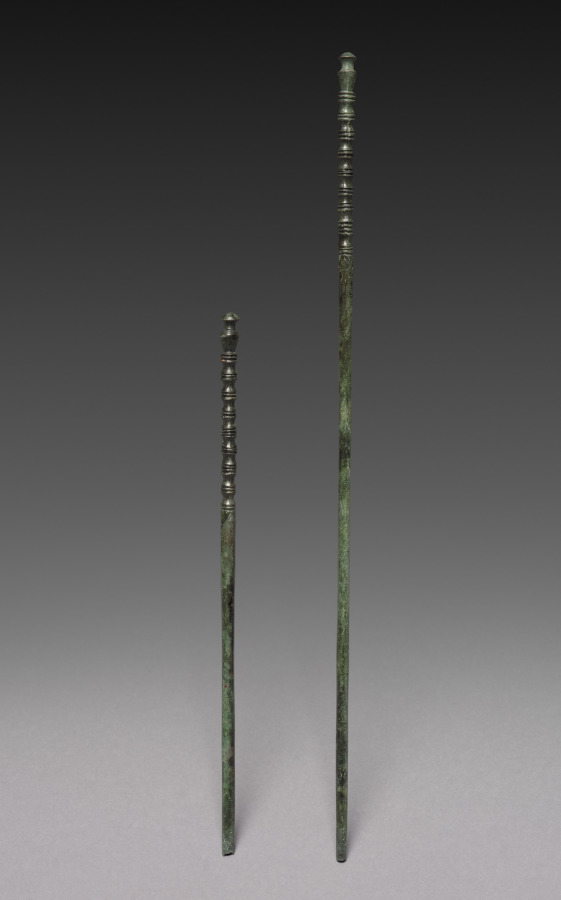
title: Pair of Chopsticks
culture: Korea, Goryeo dynasty (918–1392)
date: 918–1392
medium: bronze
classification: Implements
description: In Korea, chopsticks made of metal such as brass, silver, and gold were excavated from ancient tombs and ruins dated to the 500s at the earliest. Burial goods often include utilitarian objects such as table wares and utensils because the dead were believed to need them in the afterlife.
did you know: In contrast to the Chinese and Japanese, Koreans still prefer metal chopsticks (stainless steel and brass) to wooden ones.